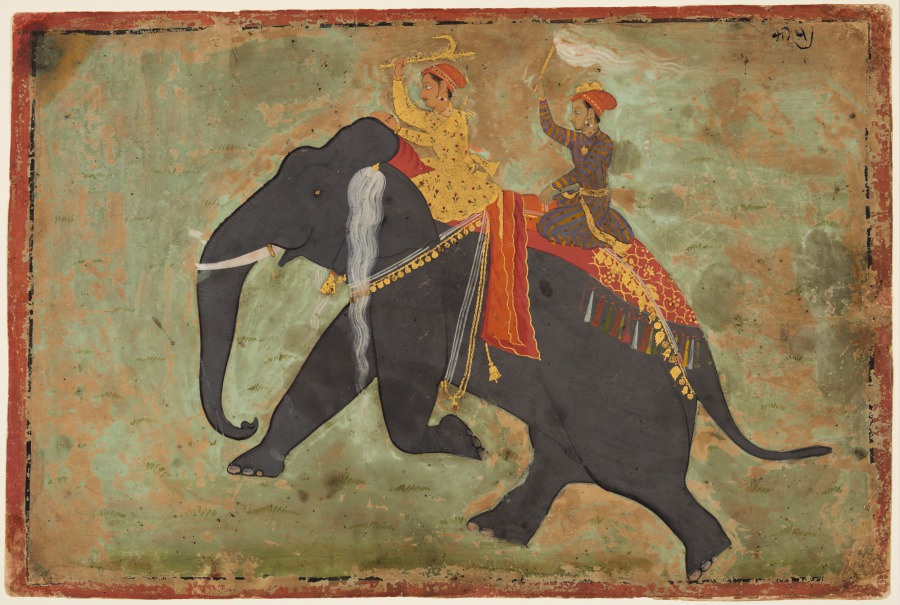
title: Prince Amar Singh (1672–1710) Drives His Own Elephant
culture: Northwestern India, Rajasthan, Rajput Kingdom of Mewar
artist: attributed to Mewar Stipple Master (Indian)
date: c. 1695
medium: gum tempera and gold on paper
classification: Painting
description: A youthful prince clad in yellow jama (belted tunic) holds a goad in his hand to control his elephant. His attendant sits in the back holding the royal insignia, a flying whisk, which billows in response to the velocity with which the elephant is running. The background of the painting is monochromatic green, a highly corrosive pigment.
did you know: The tusk of the elephant is decorated with a gold ring.